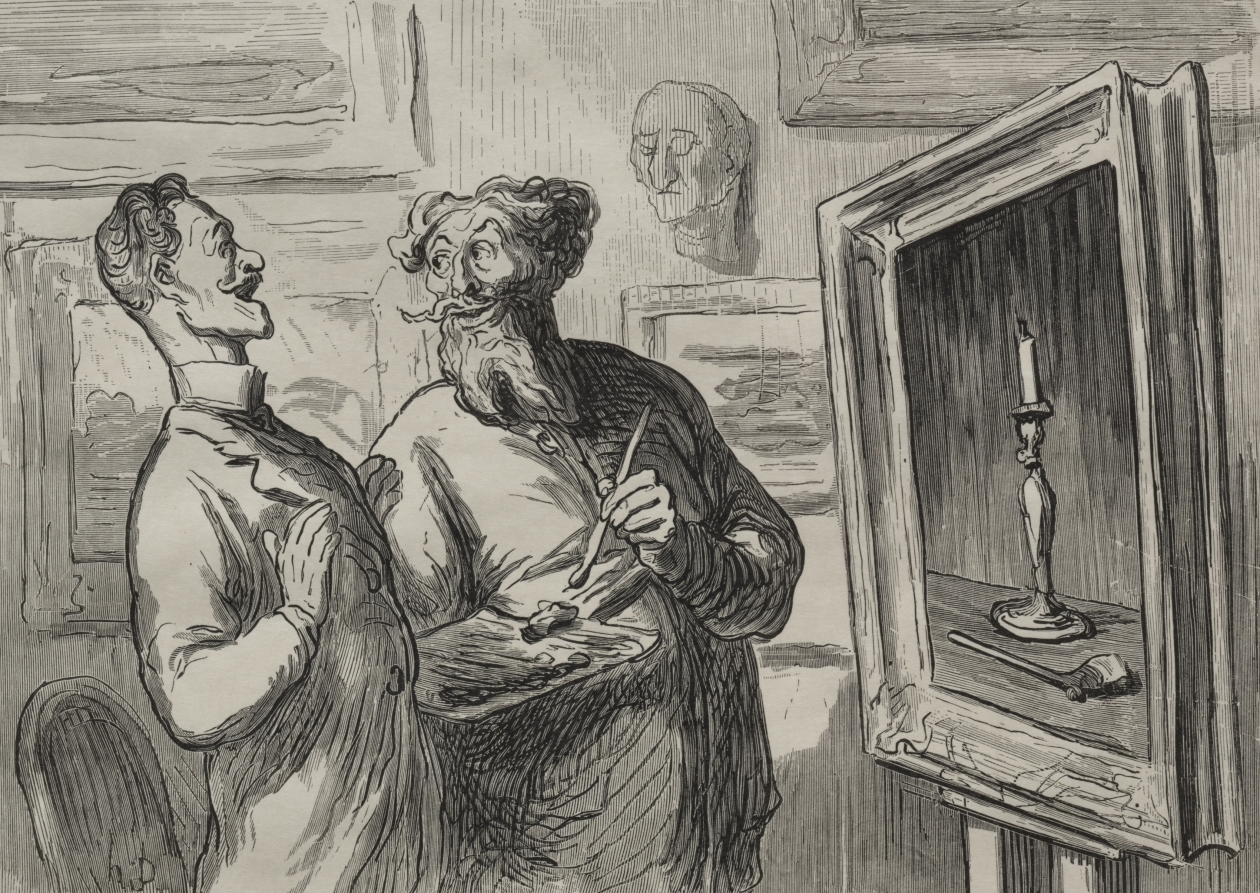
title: A realist always finds another realist to admire him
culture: France, 19th century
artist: Honoré Daumier (French, 1808–1879)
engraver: Étienne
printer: François Louis Schmied (Swiss, 1873–1941)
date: 1869, printed 1920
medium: wood engraving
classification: Print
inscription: Lower margin, in pencil: 40/75 ; red stamp: FLS